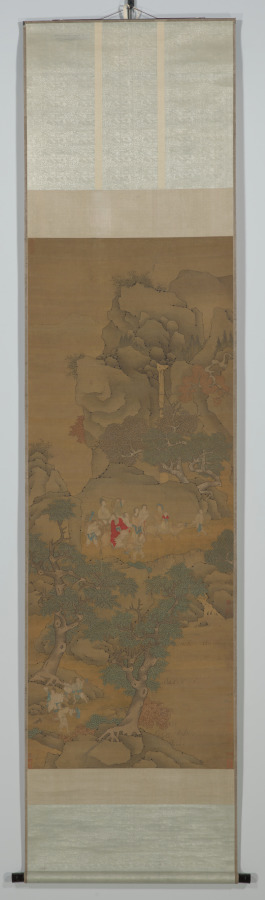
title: Xu Jingyang Moving His Family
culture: China, Ming dynasty (1368–1644)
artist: Cui Zizhong (Chinese, 1574–1644)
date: 1644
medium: Hanging scroll; ink and color on silk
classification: Painting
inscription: Artist's 2 seals: Pei-hai, Cui Zizhong yin.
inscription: 9 additional seals: 2 of Xiang Yuan (18th-19th c.); 1 of Tang Zuomei (late 18th-19th c.); 1 of Zhang Heng 張珩 (1915-1963); 1 of C. C. Wang 王季遷 (1907–2003); 4 unidentified.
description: Xu Jingyang was a dedicated fourth-century Confucian official who allegedly turned into a Daoist immortal. This scroll depicts the legend that when he attained immortality, he took his entire household, including chickens and dogs, to paradise. Cui Zizhong’s painting style intentionally referenced ancient masters. Typical of the pre-Song dynasty landscape tradition, there is the use of blue and green colors and an emphasis on outline rather than texture. While the trembling outlines are reminiscent of earlier painters, the flickering light on rocks and trees is a stylistic feature of Cui’s own time.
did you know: Xu Jingyang, wearing red, is in the upper register of figures, while below his servants transport a rooster, dog, and other supplies.